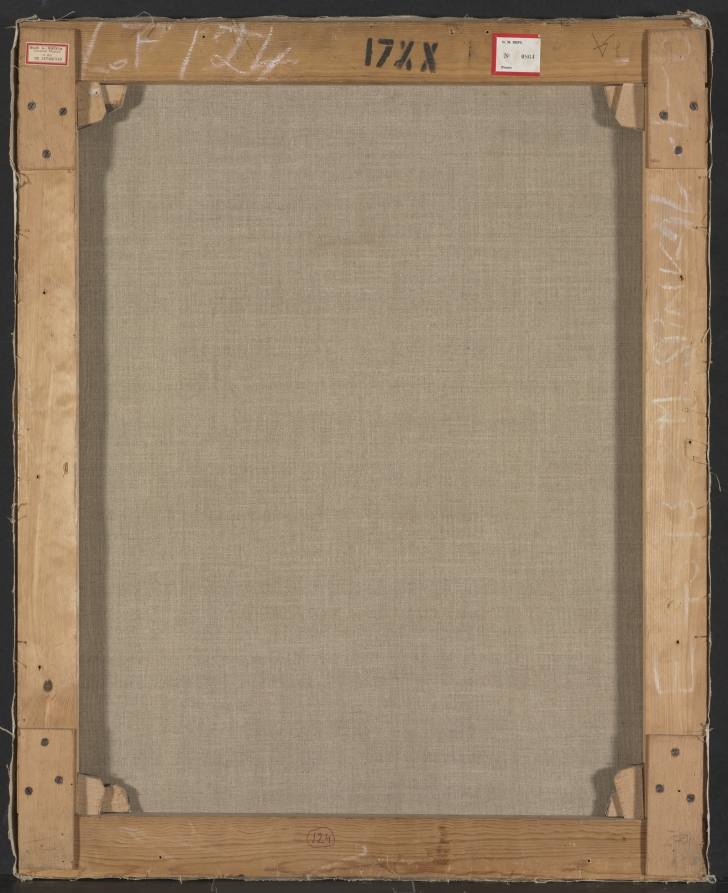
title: Lion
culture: France, 18th century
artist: Giuseppe Baldrighi (Italian, 1723–1803)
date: 1750s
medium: oil on canvas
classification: Painting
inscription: signed lower right: Oudry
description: Looking upward with eyes gleaming and mouth open, the lion conveys wild elegance. The sketch comprises short brushstrokes, and its most striking detail is the thick and plentiful mane. Undefined planes of black make up the lion's longest tresses, but closer to the face, the mane becomes increasingly light. Although the darkest parts of the mane lack precise definition, the chestnut shades of the mane host shadows and highlights that lend a sense of realism. Additionally, varied shades of brown are contrasted by the lighter, creamier shades of white at the lion's muzzle. The lifelike nature of this sketch is further communicated by the bright, wet patches on the lion's nose and mouth. Likewise, a bright glimmer in the lion's right eye illustrates its vitality. At the bottom right of the lion, a small signature attributes the painting to the French animal painter Jean-Baptiste Oudry, although this signature was a later addition. This is actually the work of the Italian painter Giuseppe Baldrighi, court artist to the Dukes of Parma. Sent to Paris in 1752, Baldrighi studied with a number of leading French painters, including Oudry, leading to a number of animal studies in Oudry's style. These works emulate the elder artist's smooth handling and stem directly from Oudry's method of executing head studies of animals in expressive poses. This work has a much blunter facture, a more linear use of paint, and a lack of psychological depth in the animal's expression—all characteristic of Baldrighi.